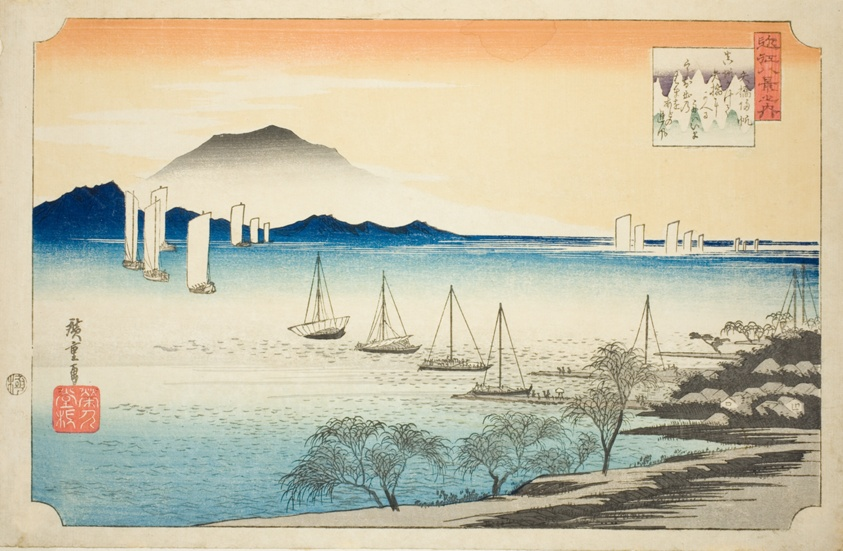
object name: Print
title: Returning Sails at Yabase (Yabase no kihan), from the series "Eight Views of Omi (Omi hakkei no uchi)"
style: Japanese (culture or style)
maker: Utagawa Hiroshige 歌川 広重; Japanese, 1797-1858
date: c. 1834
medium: Color woodblock print; oban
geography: Japan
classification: woodblock print; print; asian art